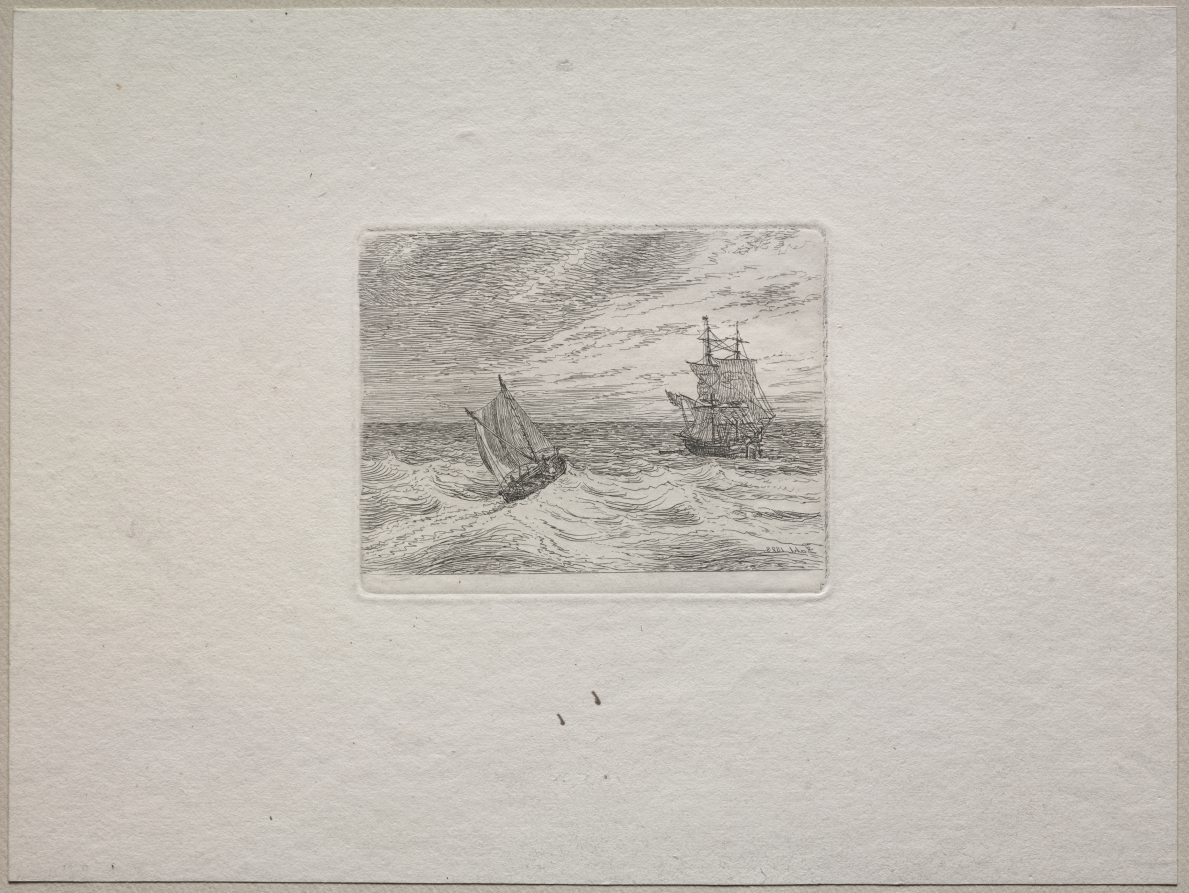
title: Rough Seas with a Two-master and Sailboat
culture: Norway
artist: Johann Christian Clausen Dahl (Norwegian, 1788–1857)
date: 1838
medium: etching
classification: Print